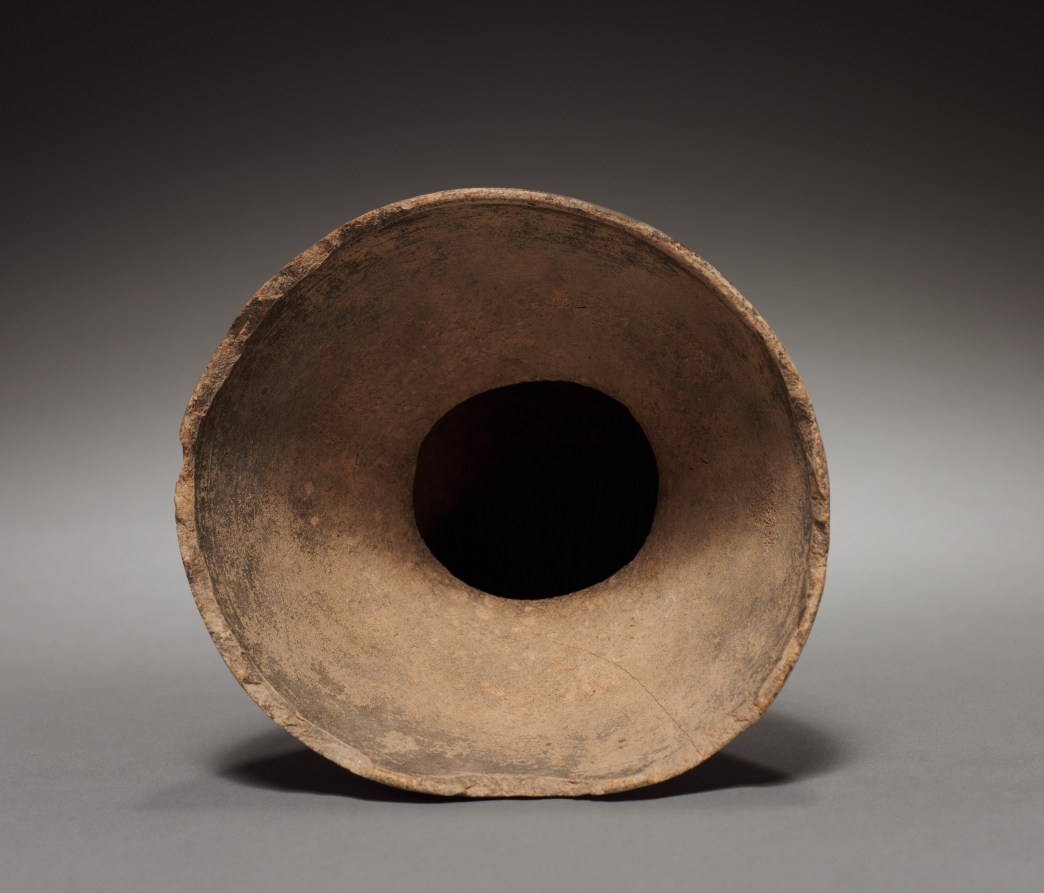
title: Bottle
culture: Peru, Pachacamac, 9th-12th Century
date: 800–1150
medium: pottery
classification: Ceramic